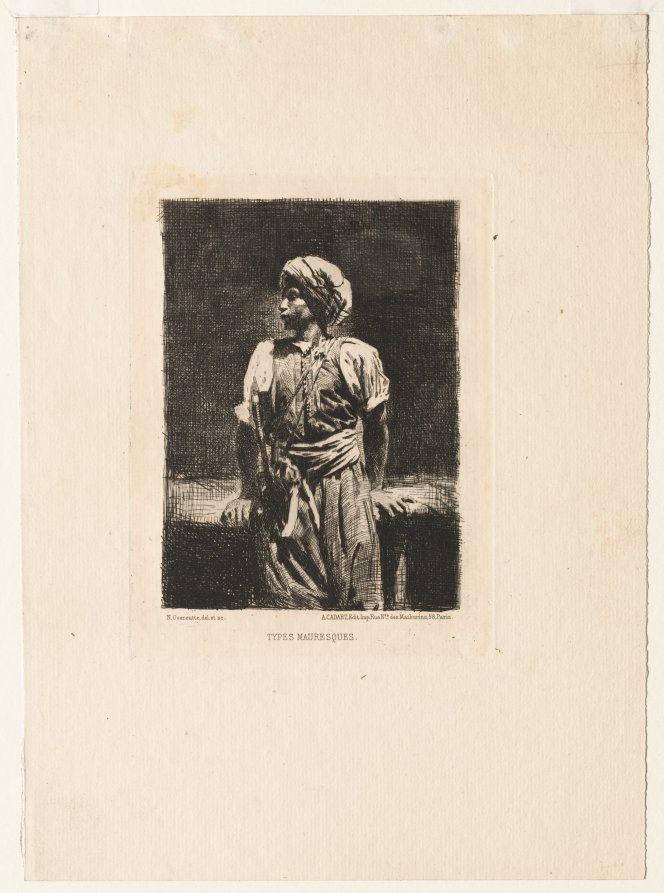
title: Types Mauresques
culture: France, 19th century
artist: Norbert Goeneutte (French, 1854–1894)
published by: A. Cadart Rue des Mathurins, 58 Paris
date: 1875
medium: etching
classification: Print